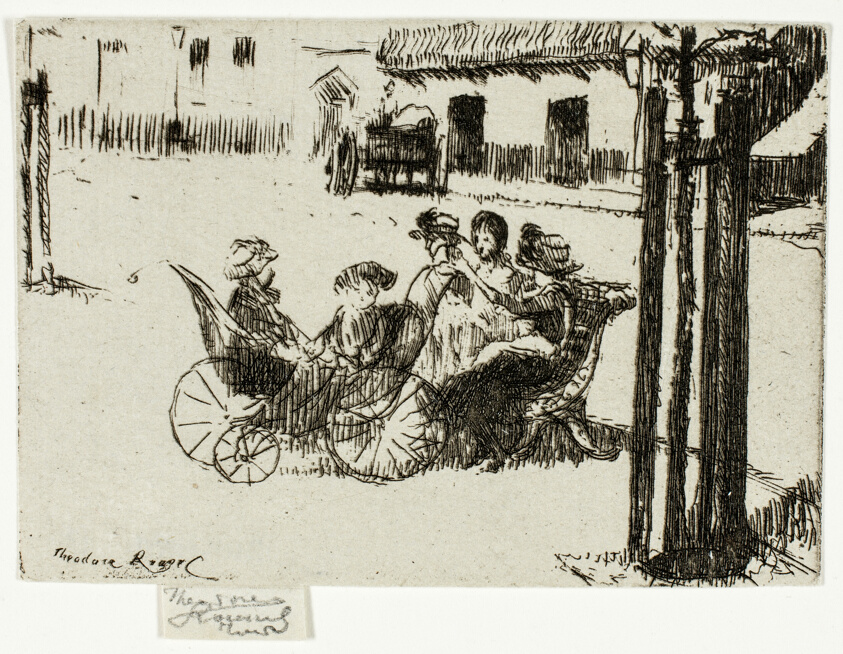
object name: Print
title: Little Girls and Perambulators, Chelsea Embankment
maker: Theodore Roussel (French, worked in England, 1847-1926)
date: 1888–89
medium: Etching in black on ivory laid paper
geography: England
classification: etching; paper; print; prints and drawing